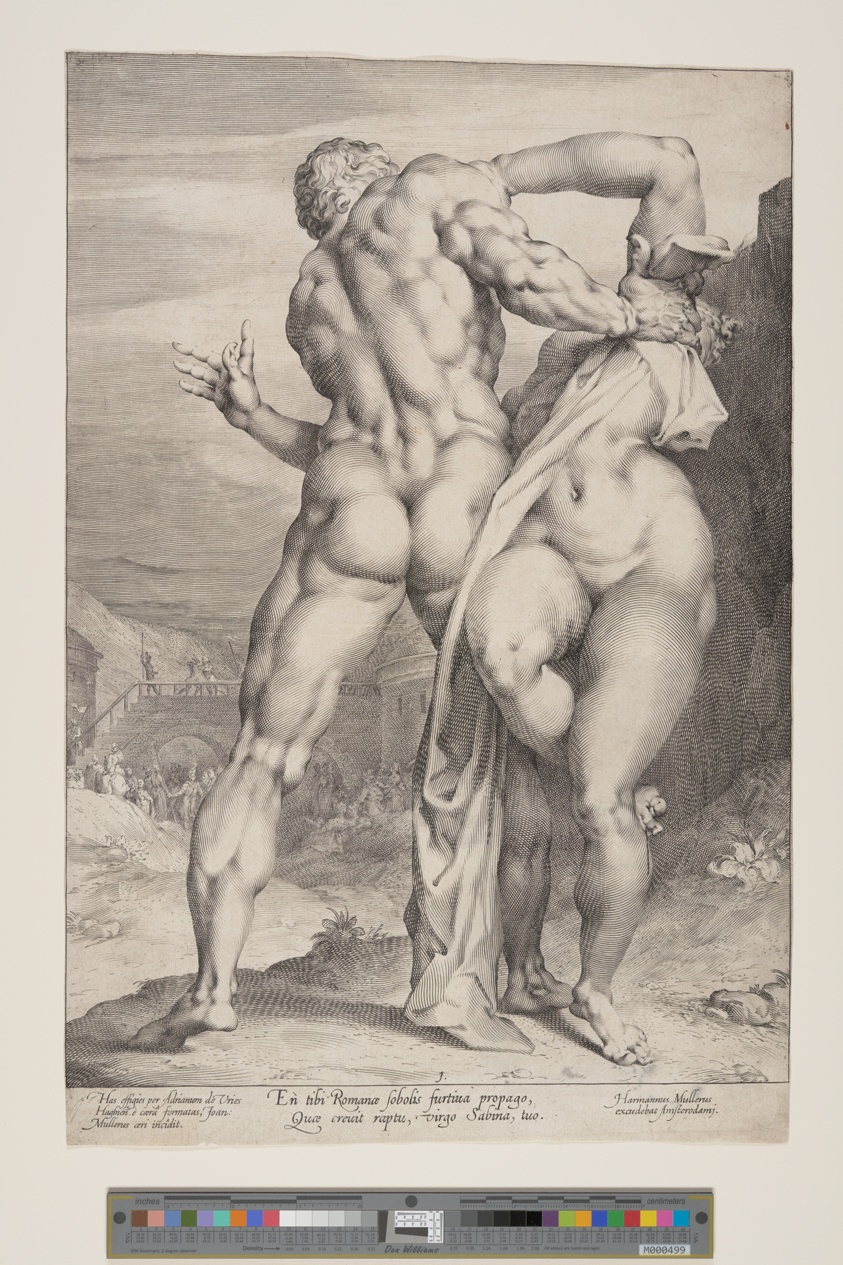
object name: Print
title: The Abduction of a Sabine Woman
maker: Jan Harmensz Muller (Dutch, 1571–1628); after Adriaen de Vries (Dutch, c. 1566–1626)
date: c. 1598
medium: Engraving on ivory laid paper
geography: Netherlands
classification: engraving; paper; print; prints and drawing